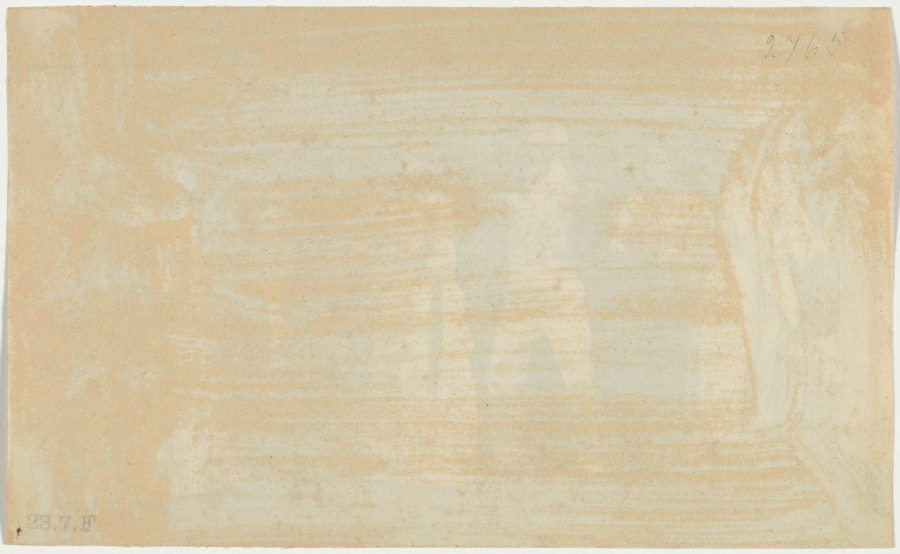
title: Fancy Ball, Indore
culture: India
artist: Raja Deen Dayal (Indian, 1844–1905)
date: 1886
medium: albumen print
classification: Photograph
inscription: Stamped in black ink on verso: “23.7.F” Written in pencil on verso: “2765”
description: Entertainments at “fancy dress” or costume parties often included amateur theatricals or tableaux vivants—static scenes drawn from literature, history, or artworks. Here, Deen Dayal captured three moments distilled from a popular novel or play. The guests—all middle or upper class—perform as characters ranging from the working class to ladies and gentlemen. Because the photographic technology of the time required strong daylight, the photographs would have been made on a separate occasion, not at the party.